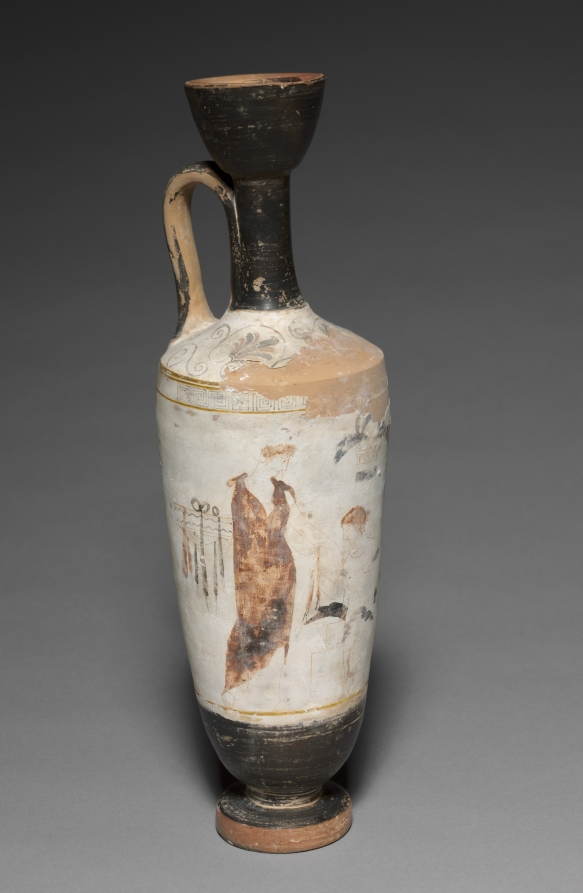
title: White-Ground Lekythos (Oil Vessel): Mourners at Tomb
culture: Greek, Attic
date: c. 400s BCE, with modern painting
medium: ceramic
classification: Ceramic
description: In its basic shape and decorative scheme—three figures before a stepped tomb marker—this lekythos resembles hundreds of funerary vessels made in Athens during the fifth century (400s) BC. But unusual features of the painted decoration, including the multicolored palmettes on the shoulder, and the shoes worn by the youth, suggest a modern intervention. Zinc found in analysis of the white ground is also likely modern, although the vessel itself may be ancient.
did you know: Both stylistic and technical studies suggest that this vase is not wholly ancient.